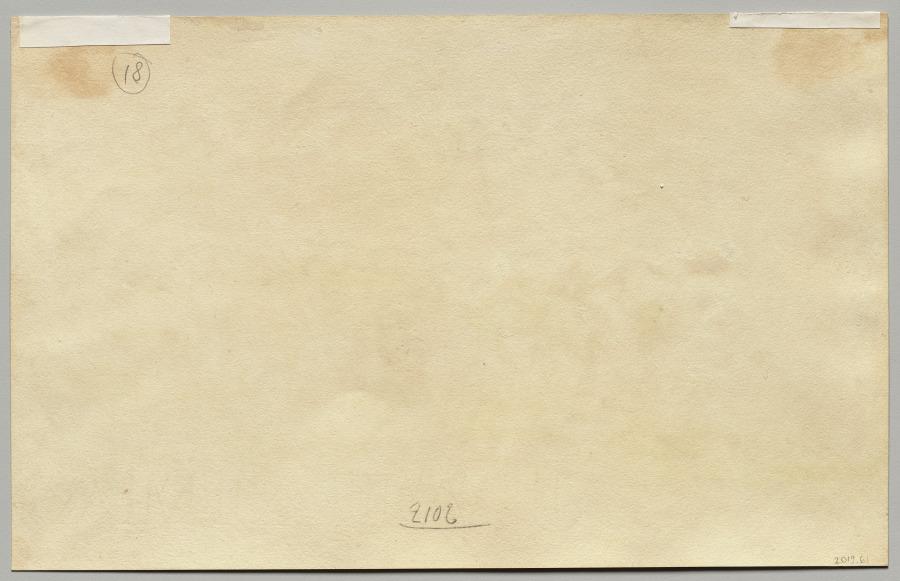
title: A Caravan in the Desert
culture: France, 19th century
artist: Narcisse Berchère (French, 1819–1891)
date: c. 1860s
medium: watercolor on wove paper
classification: Drawing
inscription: Watermark: J WHATMAN, at lower margin on verso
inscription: Signed, at lower right, in ink: “Berchère.”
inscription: Inscribed, on verso, at upper left, in pencil: “18”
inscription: Inscribed on verso at lower center margin, in pencil: “2[?]102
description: This drawing is one of many in which Narcisse Berchère depicted the desert landscape of Egypt—which France had attempted to colonize just a few decades before. Here, a party of travelers walks through a flat and expansive space accompanied by camels. After studying in Paris, Berchère made his first of several trips to North Africa, which served as inspiration for much of his work.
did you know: In addition to making numerous watercolors depicting Egypt, Narcisse Berchère published a book about his travels there.